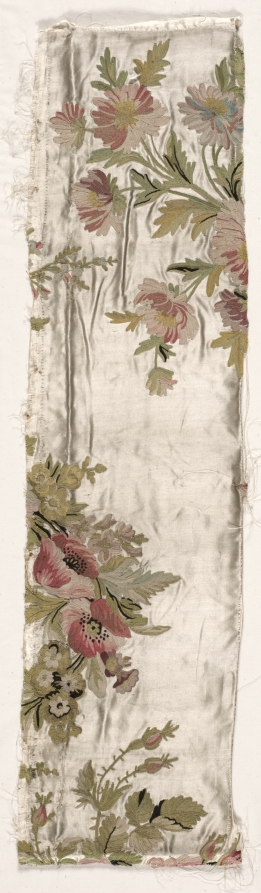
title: Coverlet Fragment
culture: France, 18th Century, period of Louis XVI (1774-1793)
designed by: Philippe de Lasalle (French, 1723–1805)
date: c. 1760–1770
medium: embroidered satin and silk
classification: Textile